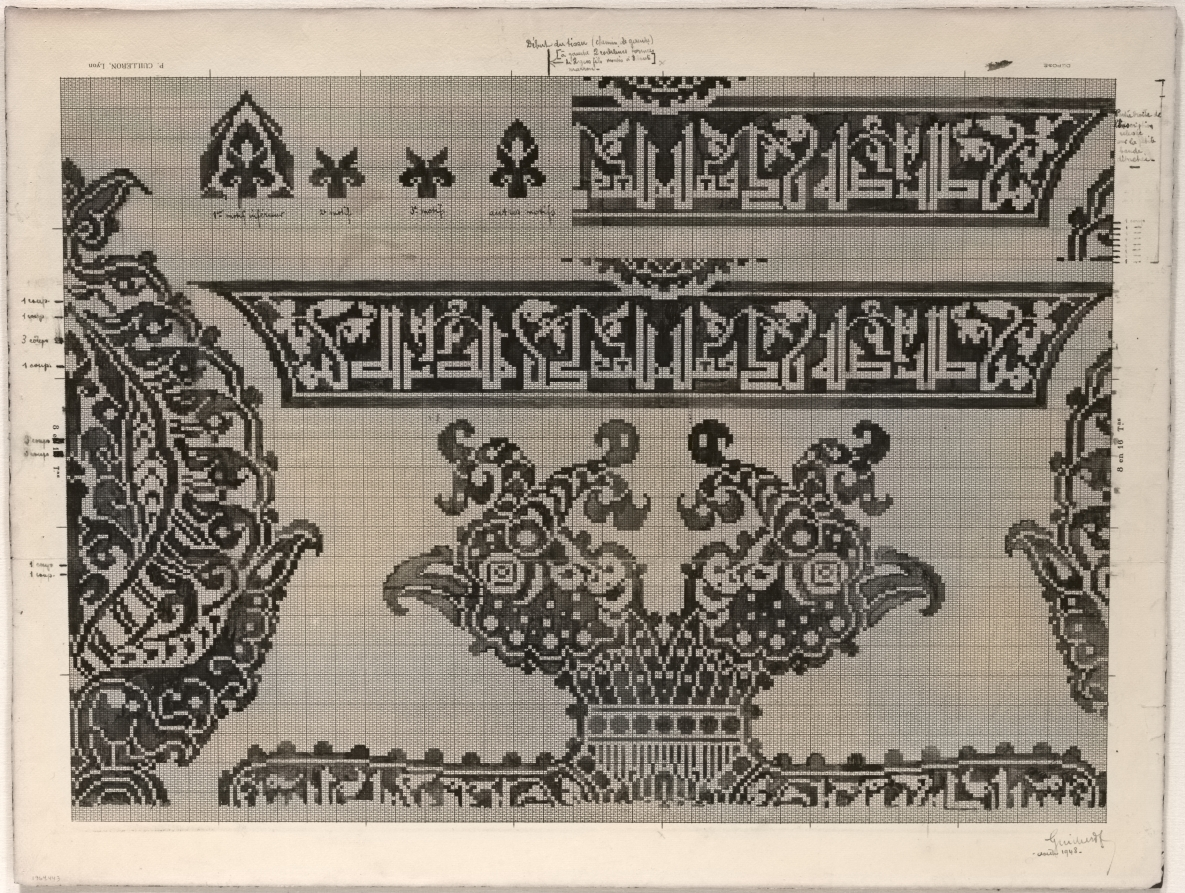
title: Schematic Drawing of Buyid Silk (1953.434)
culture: France, 20th century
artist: Félix Guichert (French)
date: 1900s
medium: ink on paper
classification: Drawing